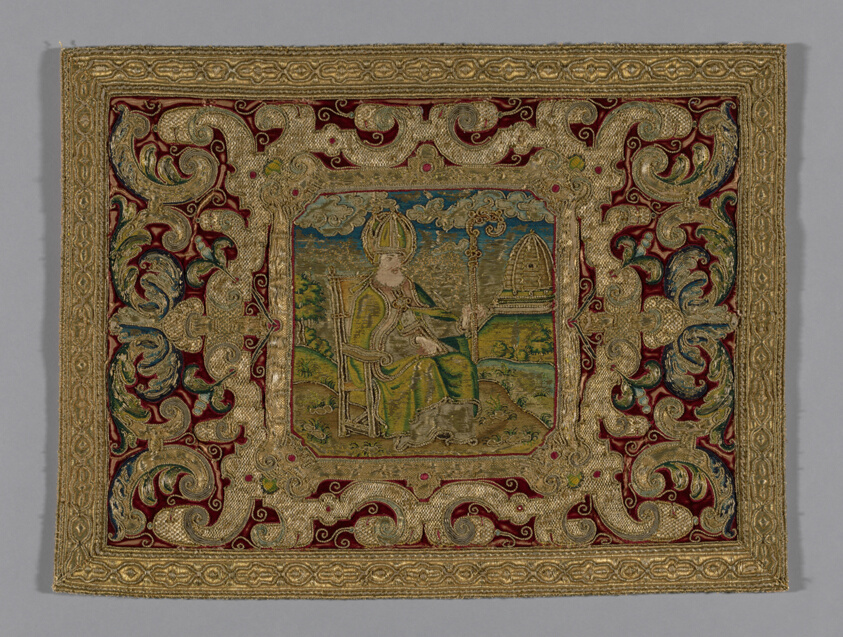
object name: Textile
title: Panel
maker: Italy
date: c. 1560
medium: Silk, velvet weave over linen, plain weave; lined with silk damask weave; embroidered in silk and gilt and silver metal wrapped on silk core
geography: Italy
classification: textile; needlework (visual works); weaving - velvet; liturgical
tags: person, chair, clouds, dome, priest, staffs, trees, water